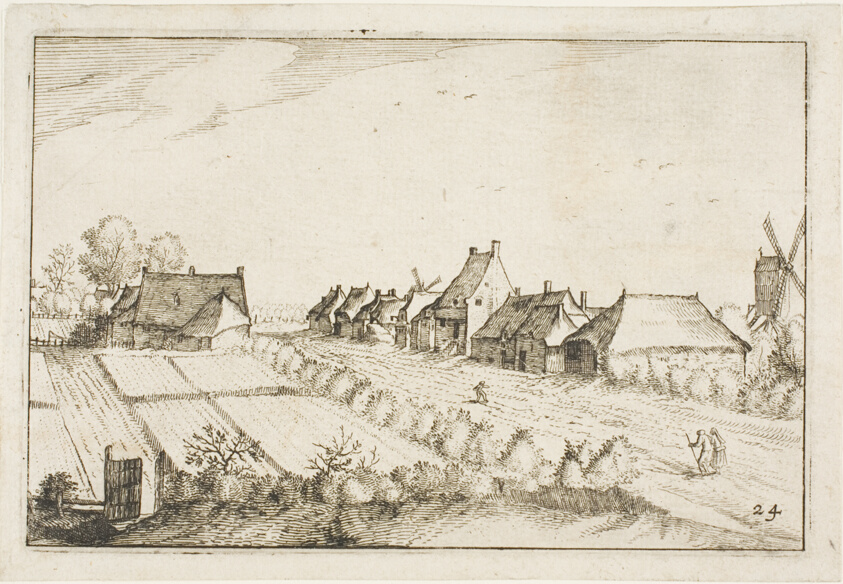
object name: Print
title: Fields and a Road, plate 24 after Pictures of Farms, Country Houses and Rustic Villages (Praediorum villarum et rusticarum casularum icones)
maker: Claes Jansz. Visscher (Dutch, 1587-1652); after Unknown Flemish Artist, misidentified as Pieter Bruegel, the elder (Flemish, 1525/30-1569)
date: 1612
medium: Etching in black on ivory laid paper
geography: Netherlands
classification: etching; print; prints and drawing